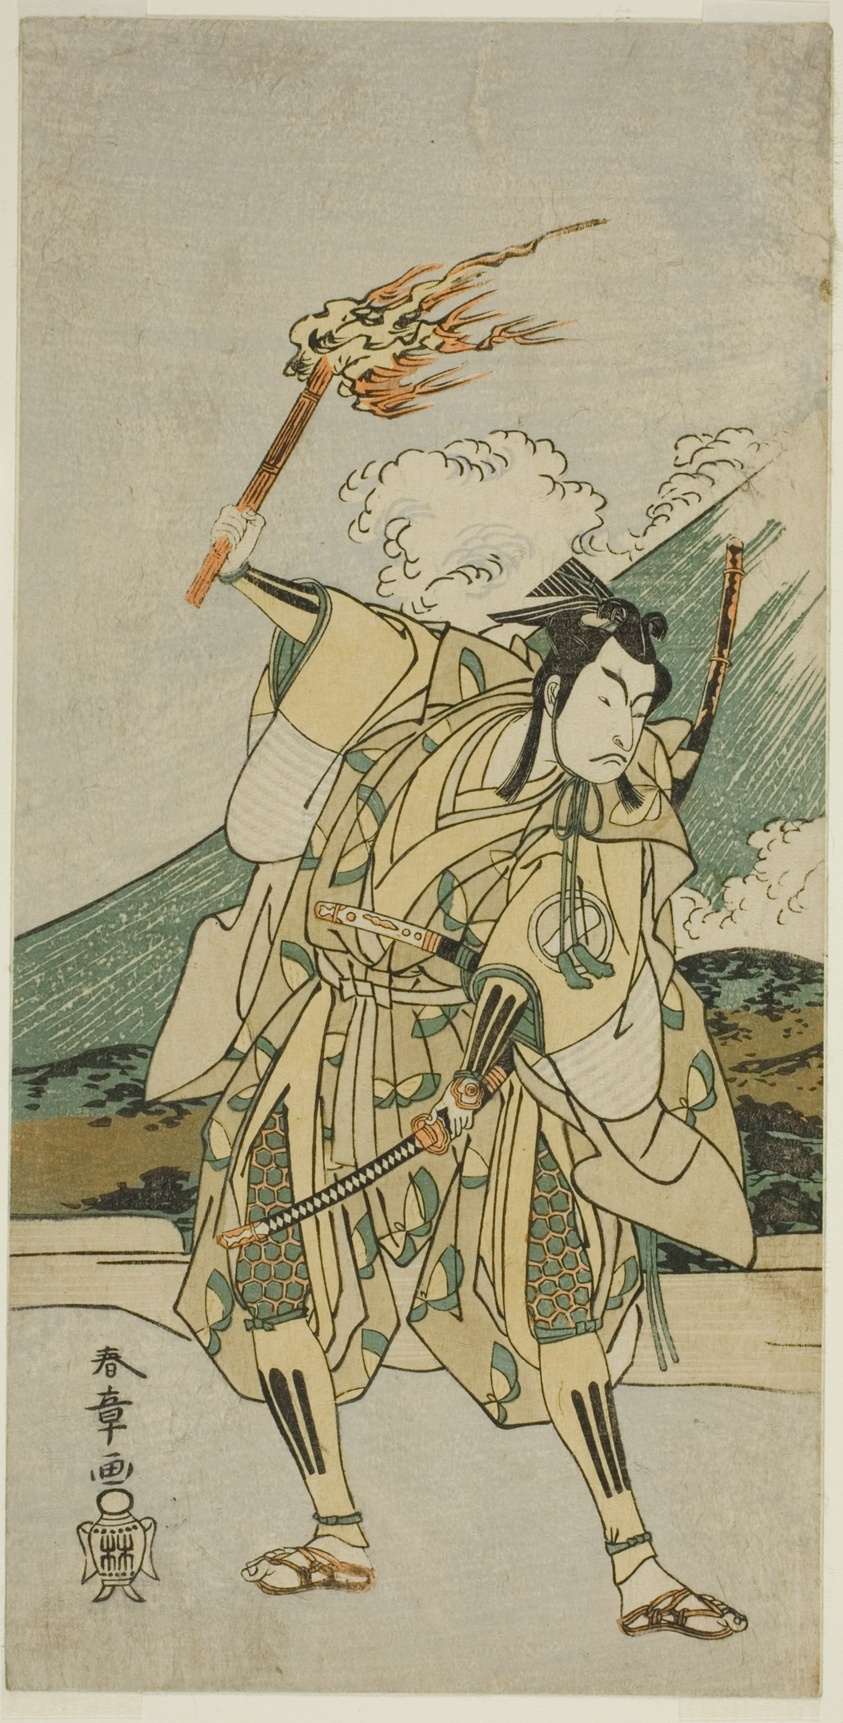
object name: Print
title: The Actor Ichikawa Monnosuke II as Soga no Goro Tokimune in the Play Haru wa Soga Akebono-zoshi (?), Performed at the Nakamura Theater (?) in the First Month, 1772 (?)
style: Japanese (culture or style)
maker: Katsukawa Shunsho 勝川 春章; Japanese, 1726-1792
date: c. 1772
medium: Color woodblock print; hosoban; left sheet of triptych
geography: Japan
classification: woodblock print; print; asian art